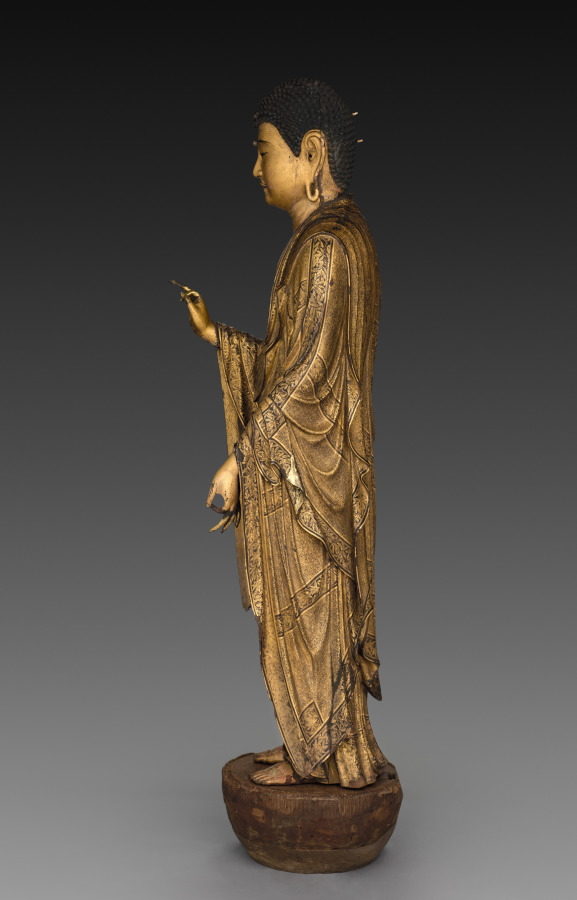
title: Buddha of Infinite Life and Light (Amida Nyorai)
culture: Japan, Kamakura period (1185–1333)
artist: Kōshun (Japanese, active mid-1200s)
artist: assisted by Koshin (Japanese, active mid-1200s)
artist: assisted by Joshun (Japanese, active mid-1200s)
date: 1269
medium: Cypress with lacquer, color, gold, cut gold, rock-crystal inlaid eyes, and quartz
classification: Sculpture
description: This ornate Buddha Amida stands in a posture of welcome, greeting the dying who will accompany him back to his Pure Land. Documents inserted into the sculpture’s hollow core around the time of its creation include a copy of the sacred text Amida Sutra, a register of donors who desired to be joined together in generating karmic merit (kechien) through the creation and dedication of the sculpture, and a record asserting that the image was completed over the course of 33 days in 1269 at Shitennōji Temple in Osaka.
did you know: The lead sculptor was Kōshun, who had been granted the lofty title “Bridge of the Law.”